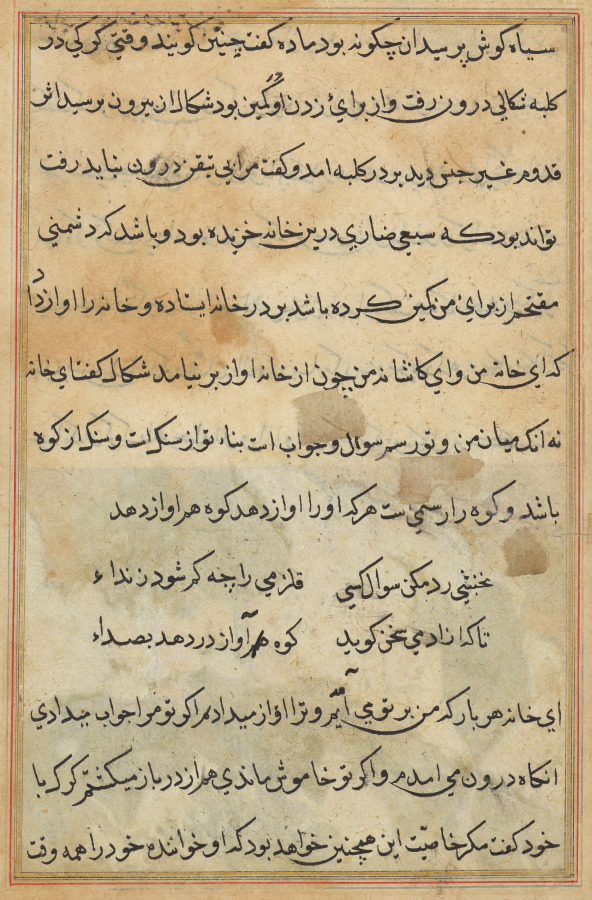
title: Tuti-Nama (Tales of a Parrot)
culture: Mughal India, court of Akbar (reigned 1556–1605)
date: c. 1560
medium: gum tempera, ink, and gold on paper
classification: Painting